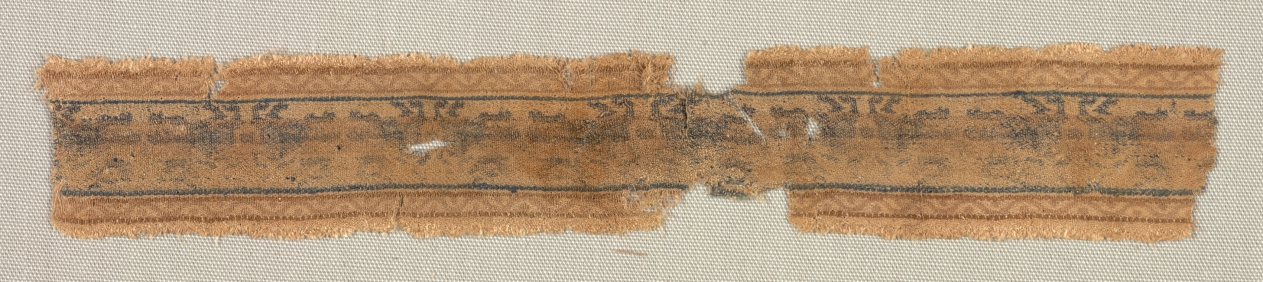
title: Fragment of Band or Border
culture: Syria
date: 500s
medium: silk: compound twill weave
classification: Textile